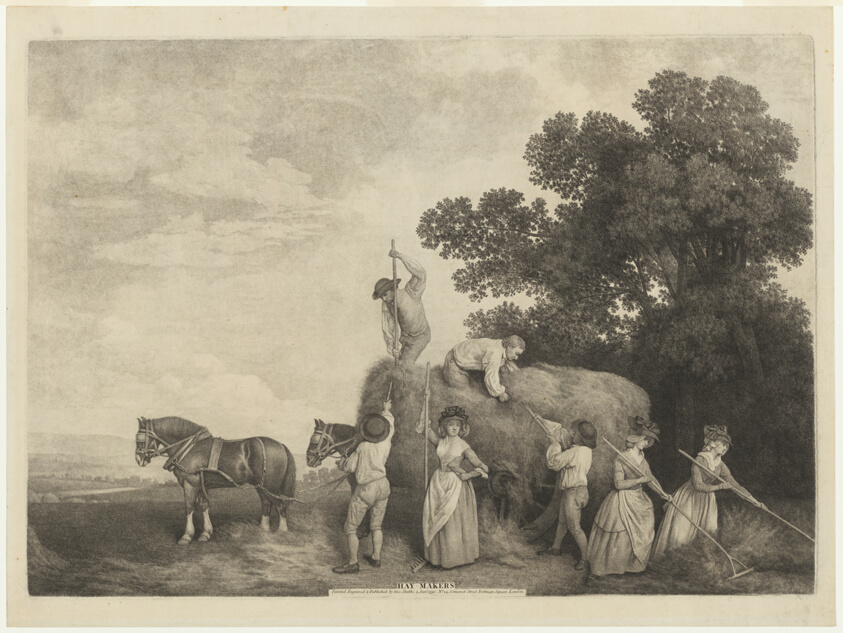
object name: Print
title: Hay-Makers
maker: George Stubbs (English, 1724-1806)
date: 1791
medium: Stipple engraving, with roulette, on ivory laid paper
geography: England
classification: engraving; print; prints and drawing